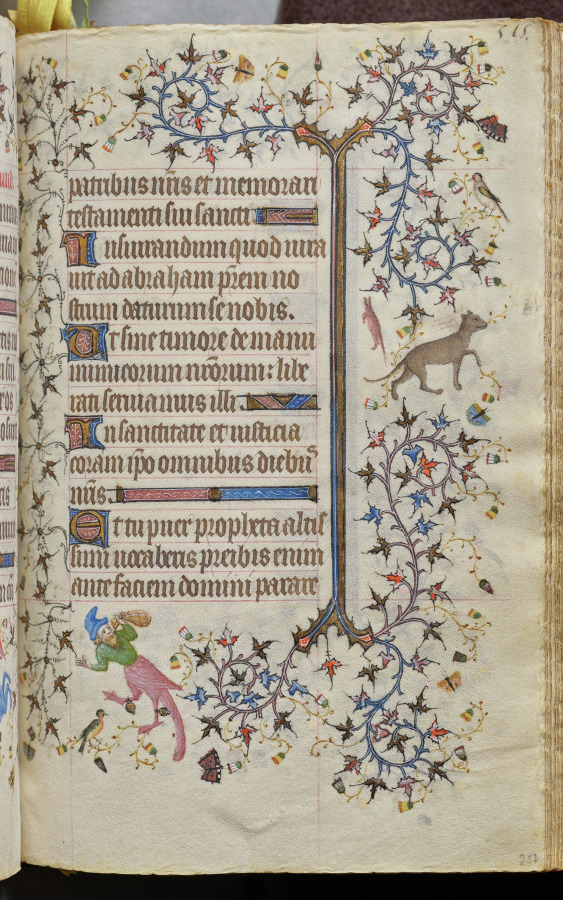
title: Hours of Charles the Noble, King of Navarre (1361-1425): fol. 252r, Text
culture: France, Paris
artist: Master of the Brussels Initials and Associates (French)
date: c. 1405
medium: ink, tempera, and gold on vellum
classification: Bound Volume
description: This precious volume was obviously highly prized by its owner, the French-born King of Navarre, who had his coat of arms painted on no less than twenty folios. Rather than directly commissioning this manuscript from a specific workshop, it seems that Charles the Noble acquired his book of hours -- perhaps ready-made for the luxury market -- while on a trip to Paris in 1404-05. A collaborative effort, six painting styles are evidenced within the pages of this codex, those of two Italians, two Frenchmen, and two Netherlanders. The painter who was responsible for the planning and decoration of the book, and who produced seventeen of the large miniatures, was a Bolognese artist known as the Master of the Brussels Initials. His principal assistant, responsible for most of the borders, was a Florentine who signed his name "Zecho" da Firenze on folio 208 verso.